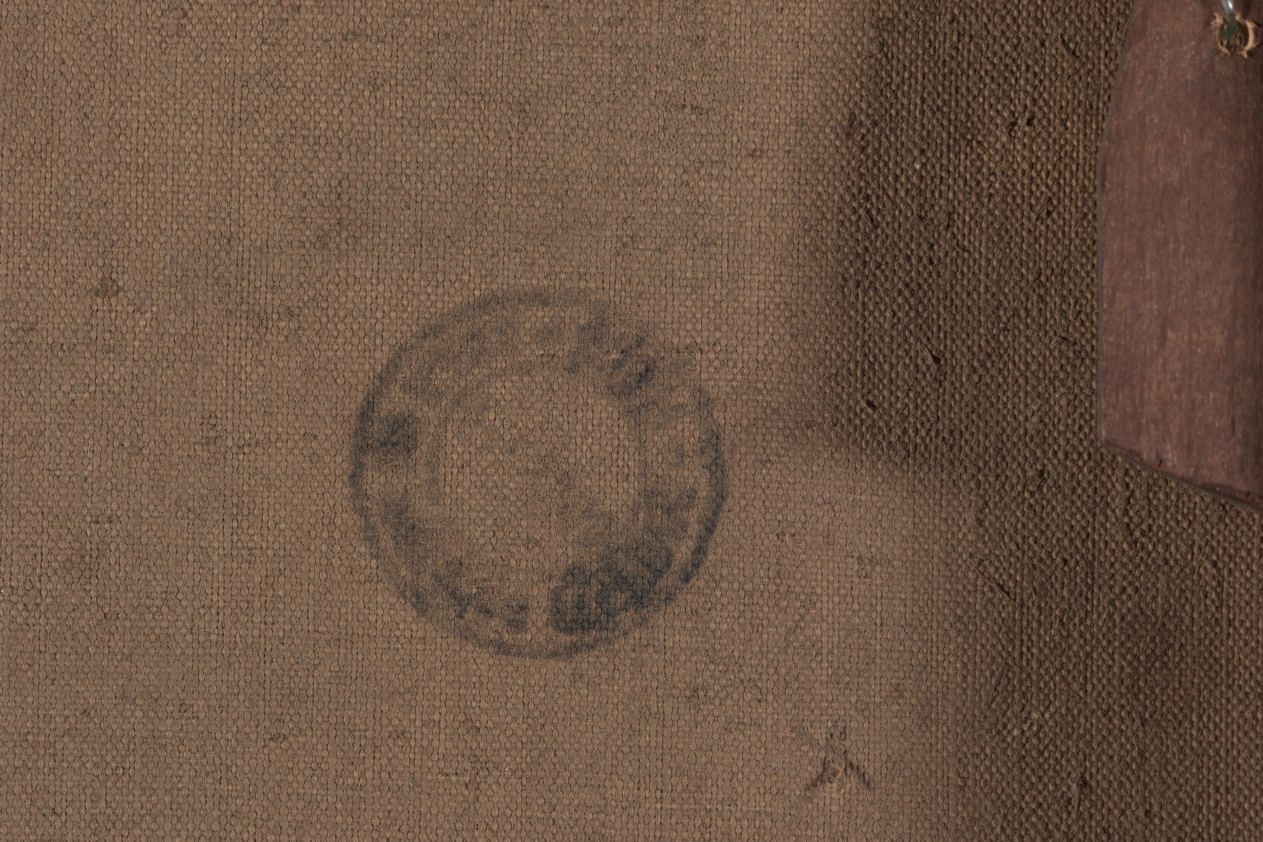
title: Lormes: Goat-Girl Sitting Beside a Stream in a Forest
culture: France, 19th century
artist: Jean Baptiste Camille Corot (French, 1796–1875)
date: 1842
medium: oil on fabric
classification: Painting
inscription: Signed lower right: Corot 1842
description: Camille Corot painted this charming woodland scene during the summer of 1842 while visiting Lormes, a small village in the Morvan region of Burgundy. The area was known for its dense woodlands and picturesque falls. Corot included a seated goat shepherd leaning against a curving tree trunk, but instead of commanding the viewers attention, the human presence is overshadowed by the dynamic interlacing forms of the tree trunks and branches that stretch up and across the canvas.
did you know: Claude Monet once said: "There is only one master here—Corot. We are nothing compared to him, nothing."